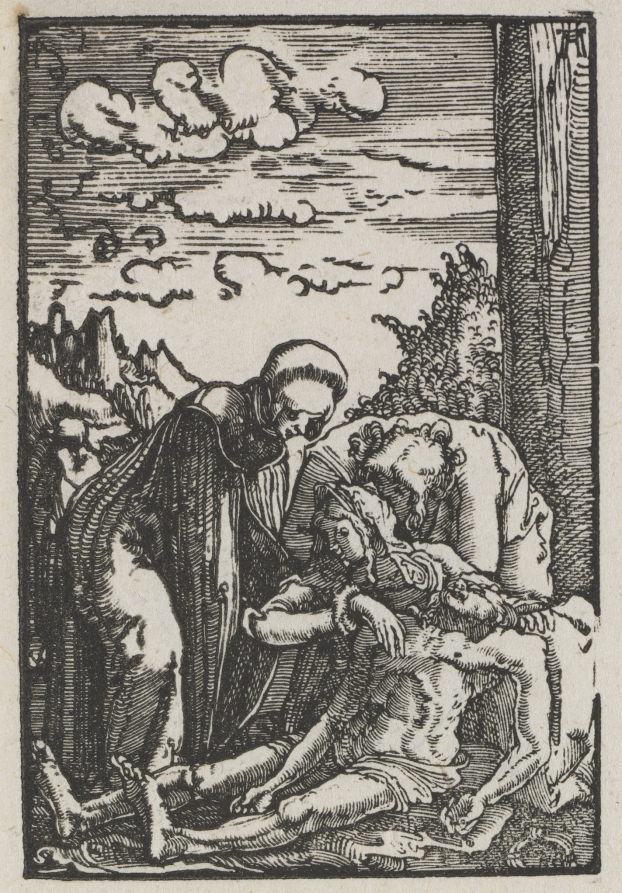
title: The Fall and Redemption of Man: The Lamentation beneath the Cross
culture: Germany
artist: Albrecht Altdorfer (German, c. 1480–1538)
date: c. 1515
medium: woodcut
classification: Print